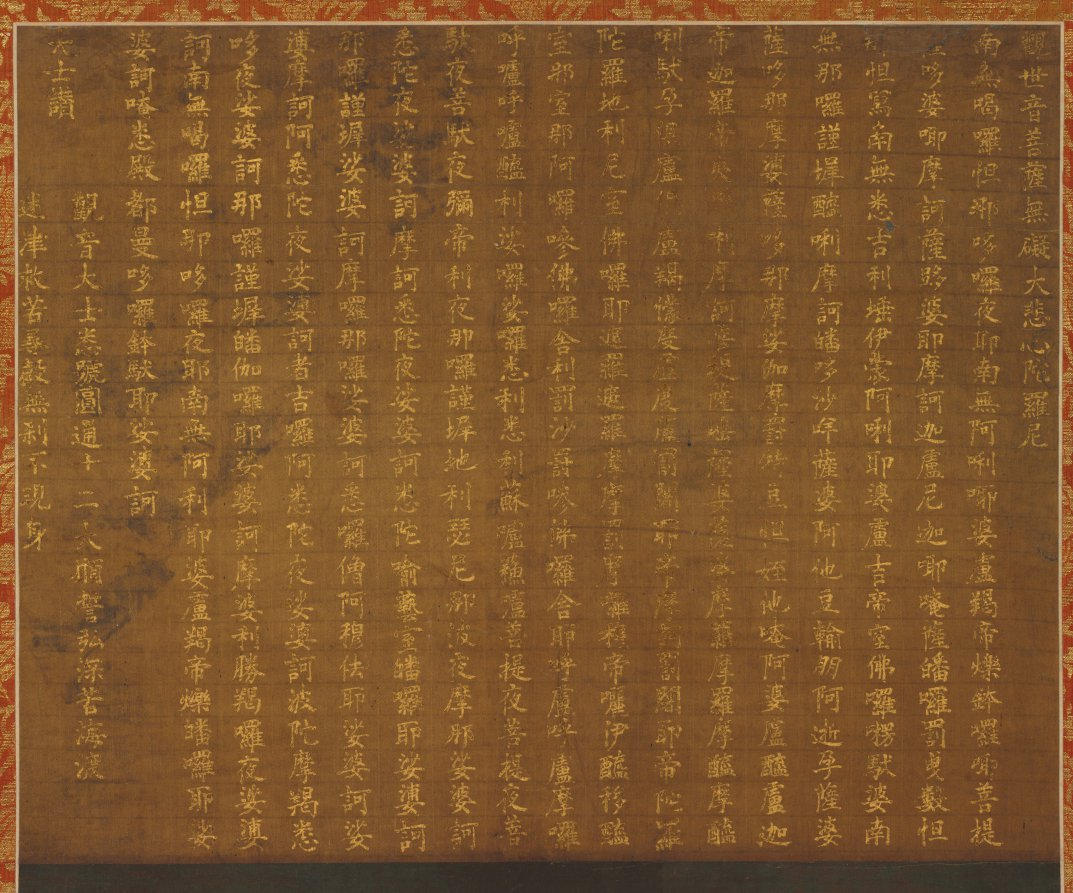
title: Kannon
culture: Japan, Meiji period (1868–1912)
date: c. 1868–1912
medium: hanging scroll; ink and color on silk; inscription in gold ink on silk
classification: Painting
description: The bodhisattva Avalokiteshvara (Kannon in Japanese) stands with each of his feet upon a lotus blossom. The Buddha Amitabha (Amida in Japanese) appears in his headdress. The text written in golden characters attached to the top of the painting is a portion of a religious text extolling the virtues of the bodhisattva. The painter was inspired by Buddhist paintings of the Korean Goreyo period (918–1392); he attempted to reproduce the diaphanous shawl sometimes seen in such early works.